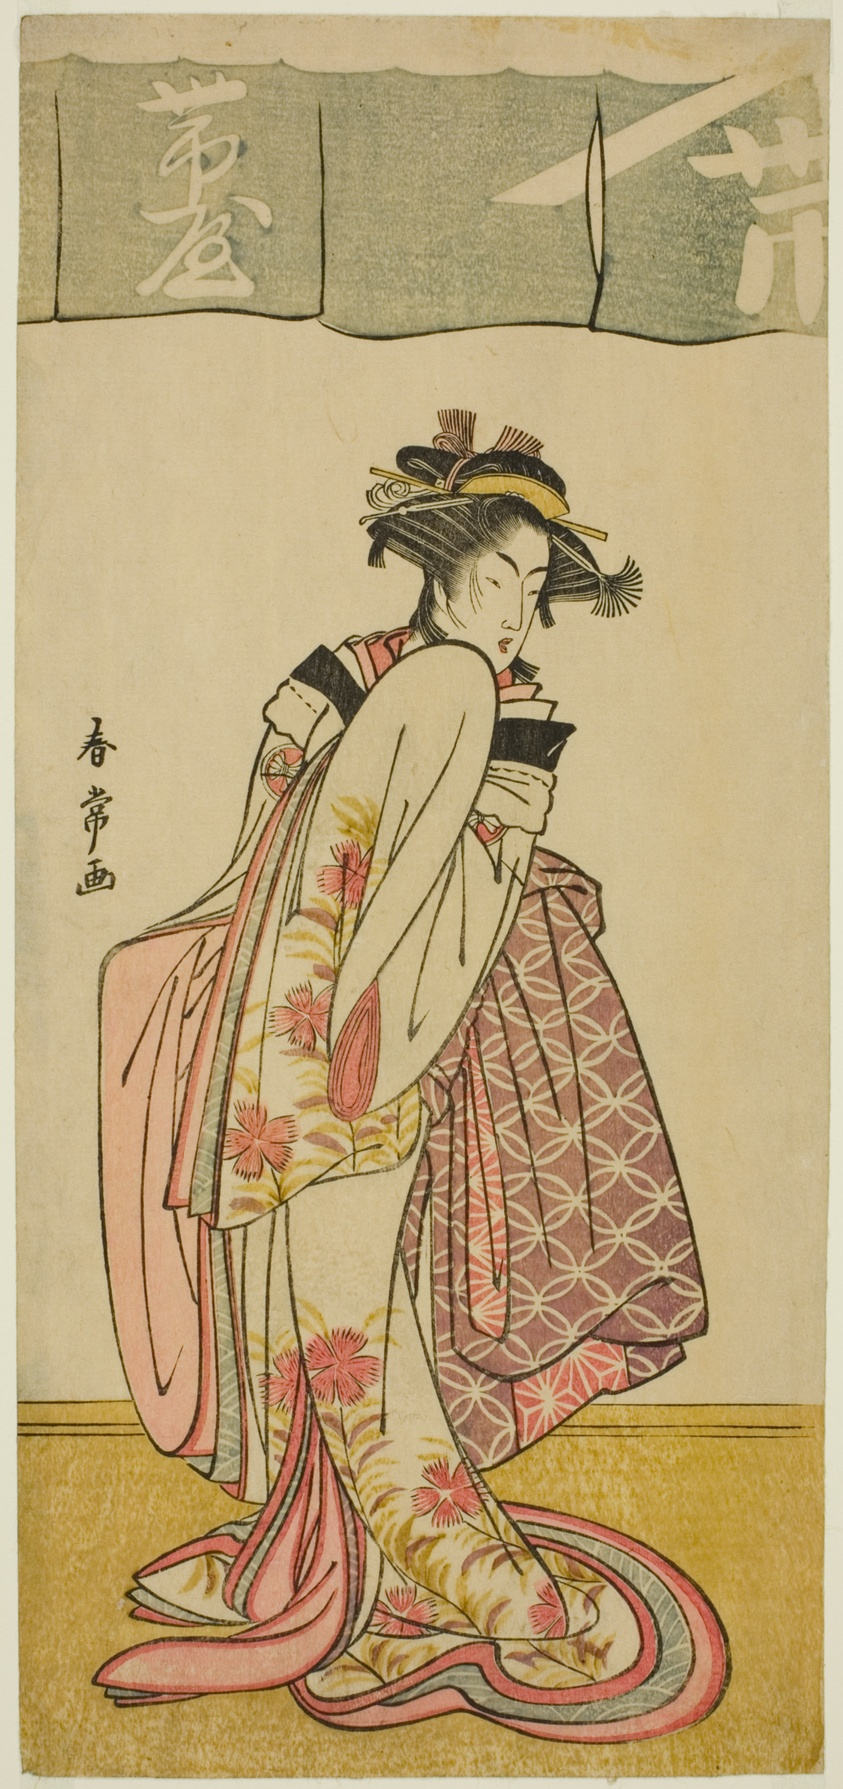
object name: Print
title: The Actor Segawa Kikunojo III as Shinanoya Ohan in the Play Kabuki no Hana Bandai Soga, Performed at the Ichimura Theater in the Third Month, 1781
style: Japanese (culture or style)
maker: Katsukawa Shunjo; Japanese, died 1787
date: c. 1781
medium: Color woodblock print; hosoban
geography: Japan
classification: woodblock print; print; asian art